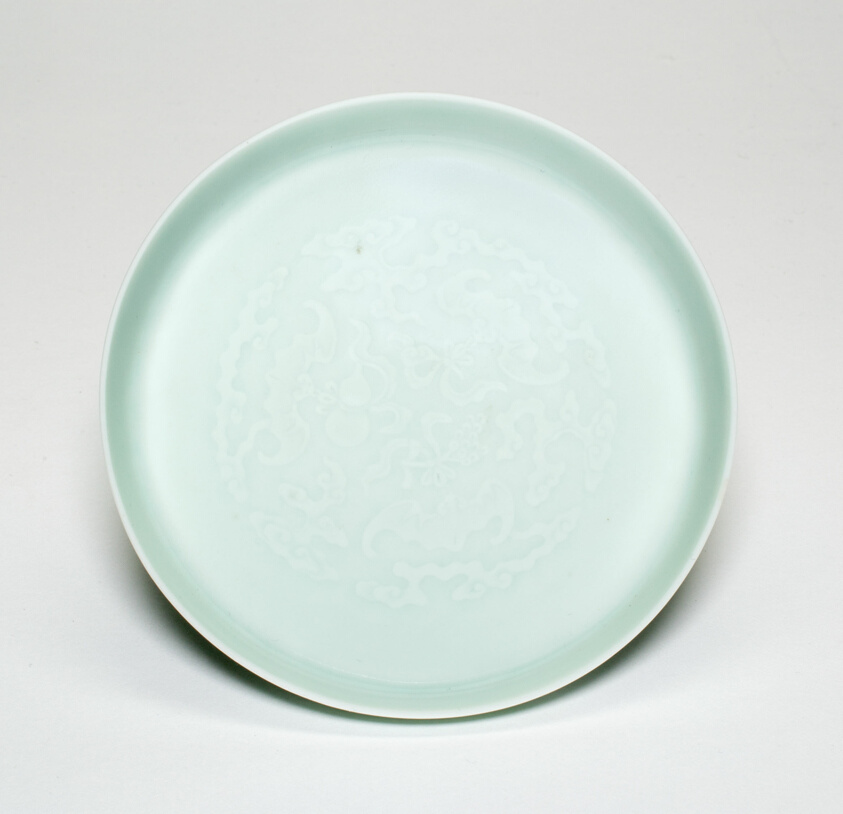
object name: Vessel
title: Dish with Clouds, Bats, Gourds, Flowers, and Jui Mushroom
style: Chinese (culture or style)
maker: China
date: Qing dynasty (1644–1911), Qianlong reign mark and period (1736–1795)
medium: Celadon-glazed porcelain with underglaze molded decoration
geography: China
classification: dish (vessel); porcelain; asian art; ceramics; vessel